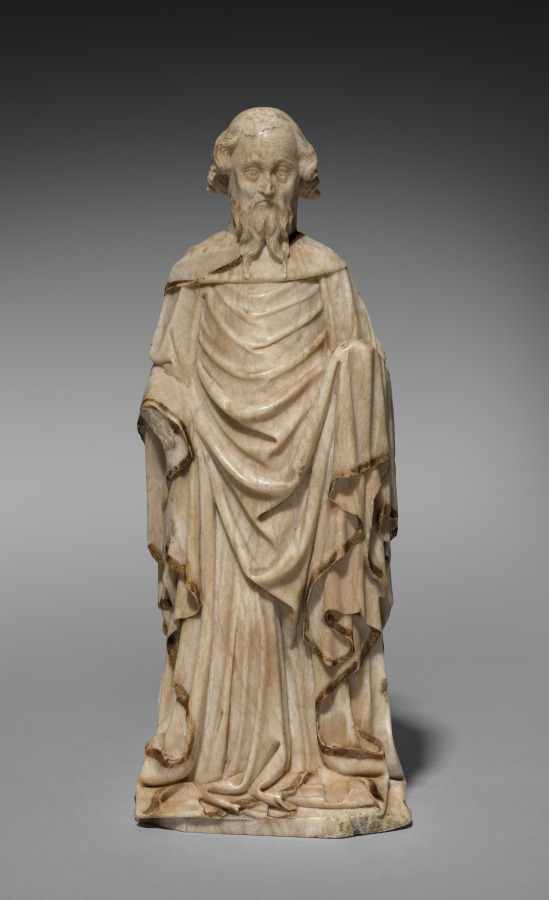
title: Standing Apostle (Saint Paul?)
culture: Southern Netherlands or Northern France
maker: Master of the Saint-Omer Apostles (Southern Netherlandish, active Bruges?)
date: c. 1430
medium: Alabaster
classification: Sculpture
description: This sculpture comes from an altarpiece in the cathedral of Saint Omer in northern France. Four other figures have been preserved there, and possibly one at the Metropolitan Museum in New York. The workshop was probably located in Bruges, in what is now Belgium. Sculpture was the leading art genre at that time. The specialized workshops obtained the stone alabaster from distant quarries, in this case from the area of Würzburg in Bavaria (Germany), to form it intricately and deliver it to customers in almost all of Europe.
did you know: Alabaster is very soft; after 20 minutes of treatment with water the surface will dissolve.